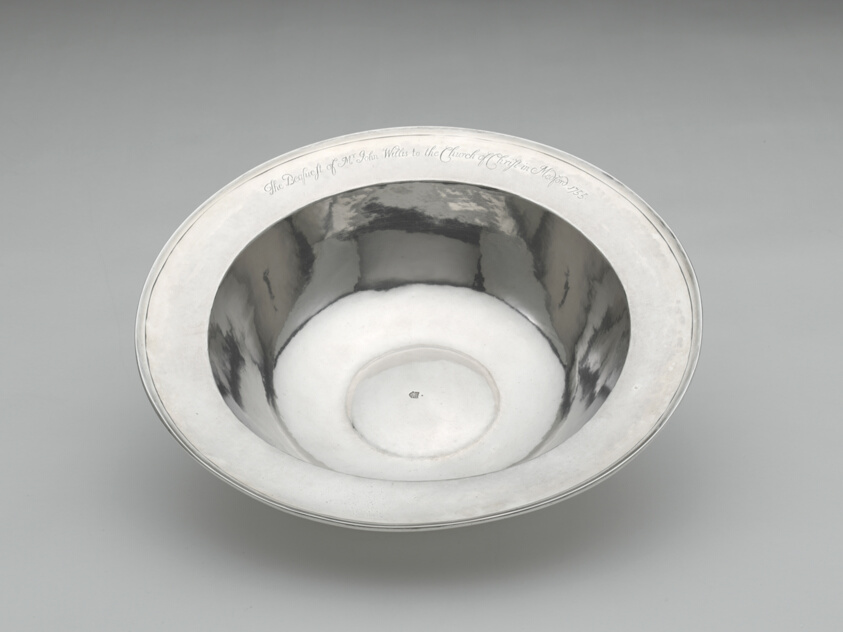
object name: Metalwork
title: Baptismal Basin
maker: Samuel Edwards; American, 1705–1762; Boston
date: c. 1756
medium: Silver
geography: Boston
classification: liturgical; silver; vessel; american decorative arts; american arts; decorative arts